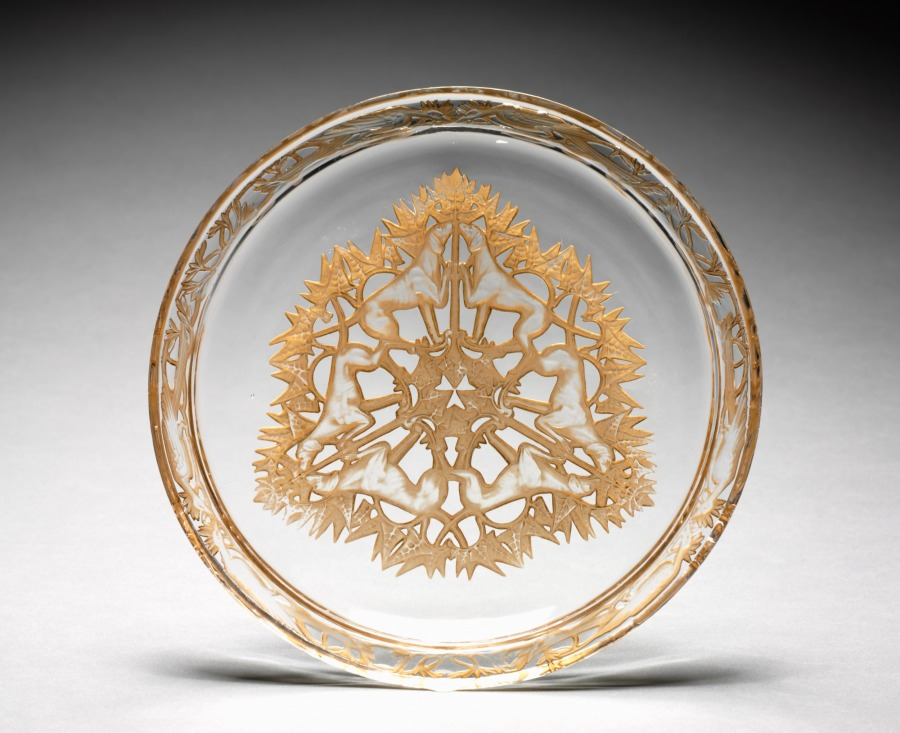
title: Hunting Dogs Plate (Assiette chasse chiens)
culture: France, 20th century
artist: René Lalique (French, 1860–1945)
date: c. 1913–21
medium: glass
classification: Glass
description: Entitled Chasse, Chiens, meaning hunt, dogs, this glass plate's gilded decoration of dogs and birds is intended to evoke the hunt. Six hunting dogs encircle the center of the plate, while game birds trim the perimeter.